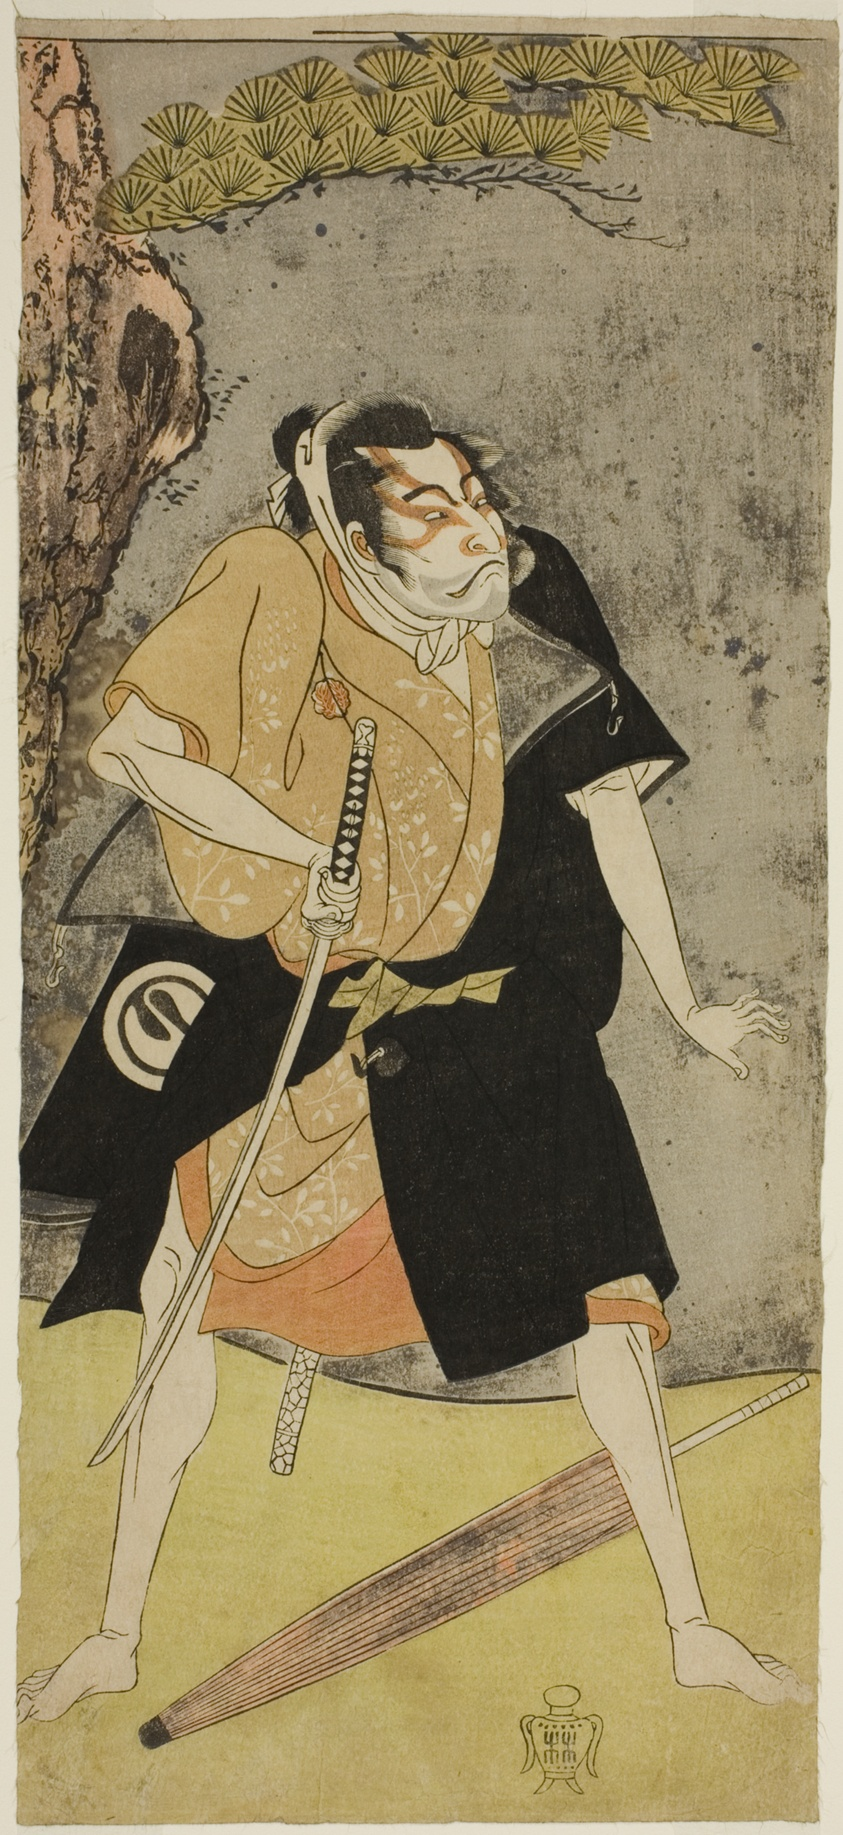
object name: Print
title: The Actor Sawamura Sojuro II as an Outlaw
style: Japanese (culture or style)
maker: Attributed to Katsukawa Shunsho 勝川 春章; Japanese, 1726-1792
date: c. 1769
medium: Color woodblock print; hosoban; from a multisheet composition (?)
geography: Japan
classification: woodblock print; print; asian art